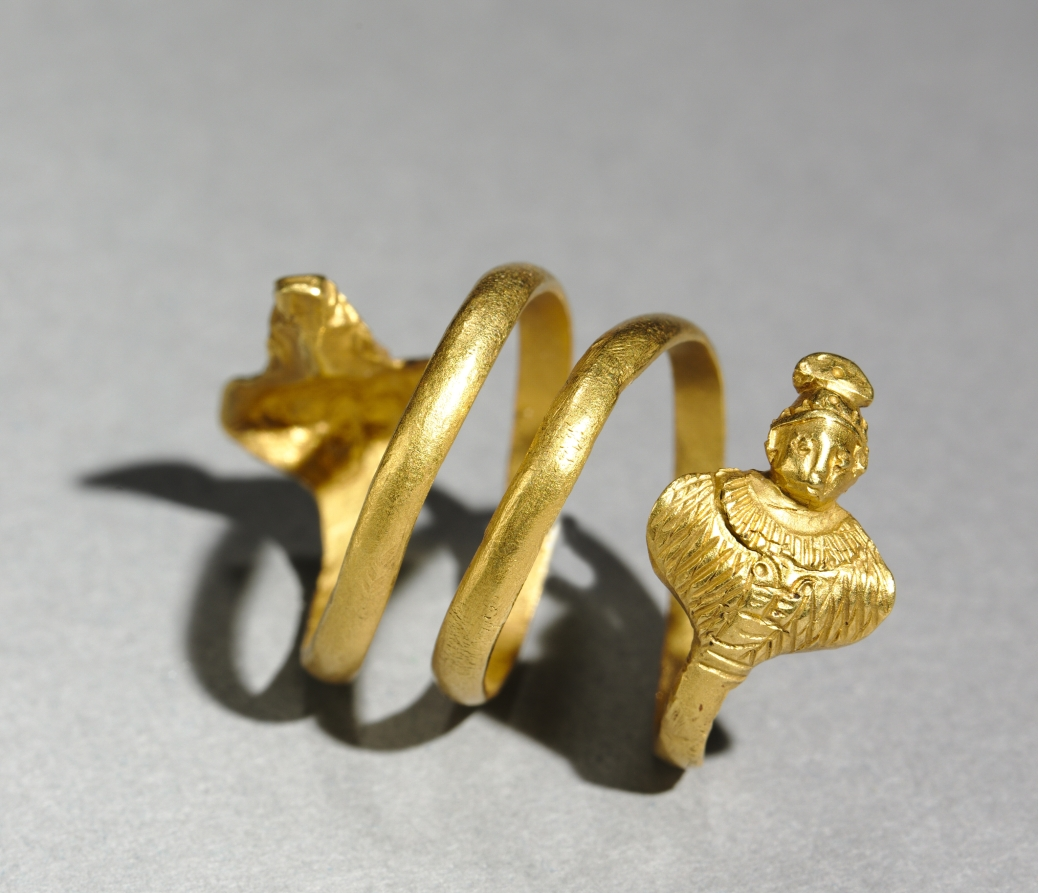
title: Spiral Ring with Isis and Serapis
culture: Greece or Italy, Rome (?)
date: 1–100 CE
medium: gold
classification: Jewelry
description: This spiral gold ring is decorated with tiny busts on either terminal, representing the gods Isis and Serapis. Both gods are shown from the waist up, with wide shoulders and small heads that create a shape reminiscent of a cobra snake.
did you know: The two ends of this spiral ring terminate in humanlike protomes.